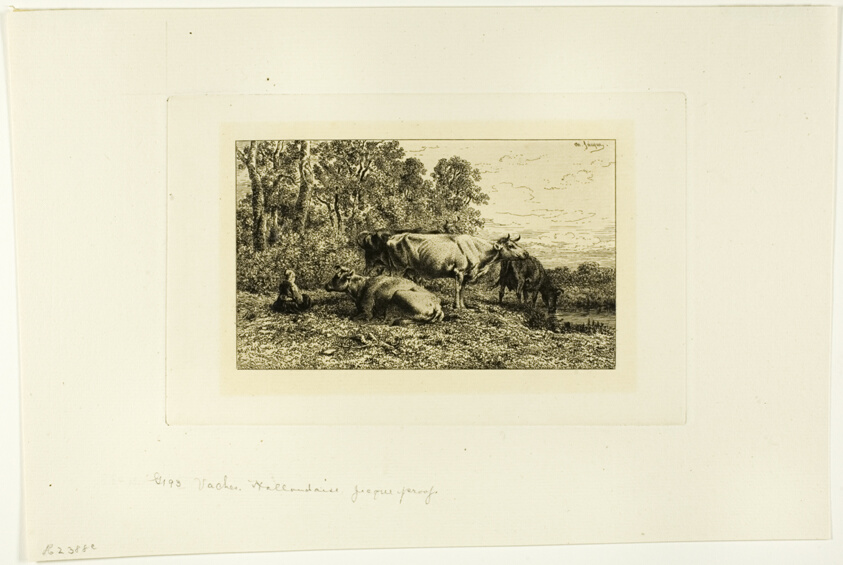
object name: Print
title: Dutch Cows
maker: Charles Émile Jacque (French, 1813-1894)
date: c. 1865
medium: Etching on ivory laid paper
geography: France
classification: etching; print; prints and drawing